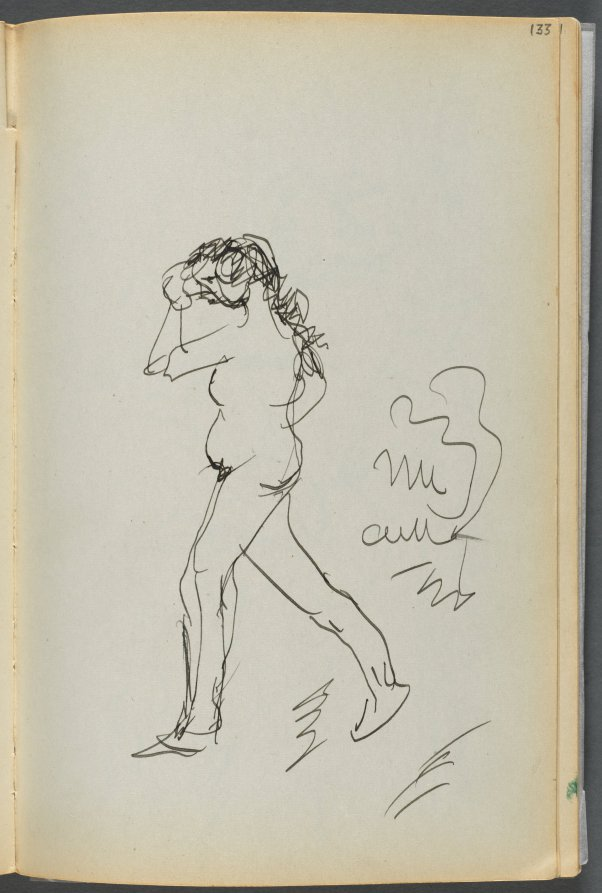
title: Sketchbook- The Granite Shore Hotel, Rockport, page 133: Nude Walking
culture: America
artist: Maurice Prendergast (American, born Newfoundland [now Canada], 1858–1924)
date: 1905–10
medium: graphite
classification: Bound Volume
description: This sketchbook contains 72 pages of pencil drawings and 9 watercolors of Cape Ann. On the inside of the cover Prendergast wrote the address of the Granite Shore Hotel in Rockport, Massachusetts.